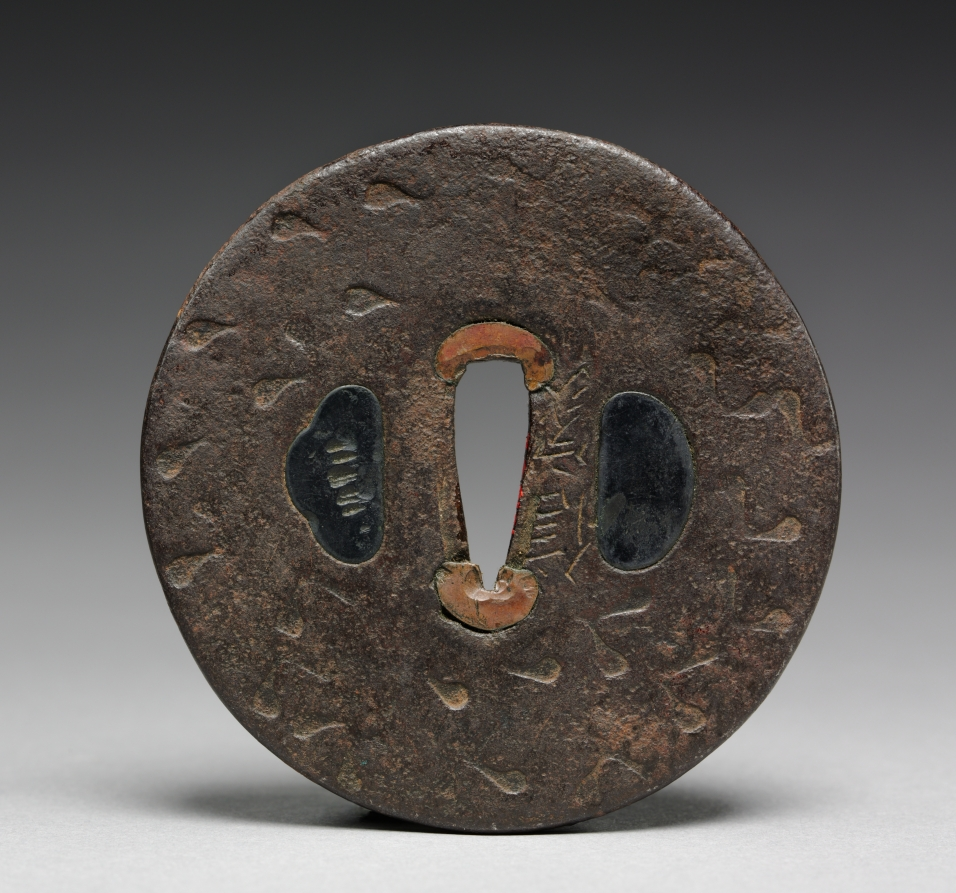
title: Sword Guard (Tsuba)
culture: Japan, Muromachi period (1392–1573)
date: 1500–1573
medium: iron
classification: Arms and Armor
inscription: Signature: Nobuiye